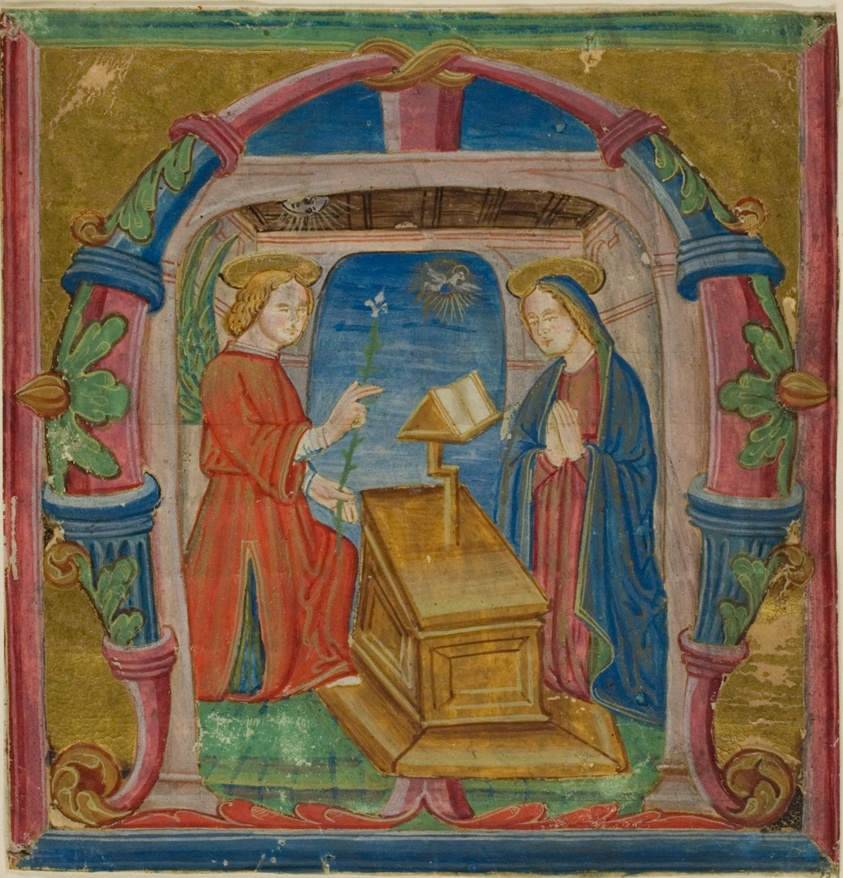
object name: Drawing and Watercolor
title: The Annunciation in a Historiated Initial "M" from an Antiphonary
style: medieval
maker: Italian (Lombardy)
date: 15th century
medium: Manuscript cutting in tempera and gold leaf on parchment, with gothica textura inscriptions in brown black ink, verso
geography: Italy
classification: tempera; manuscript; drawings (visual works); prints and drawing